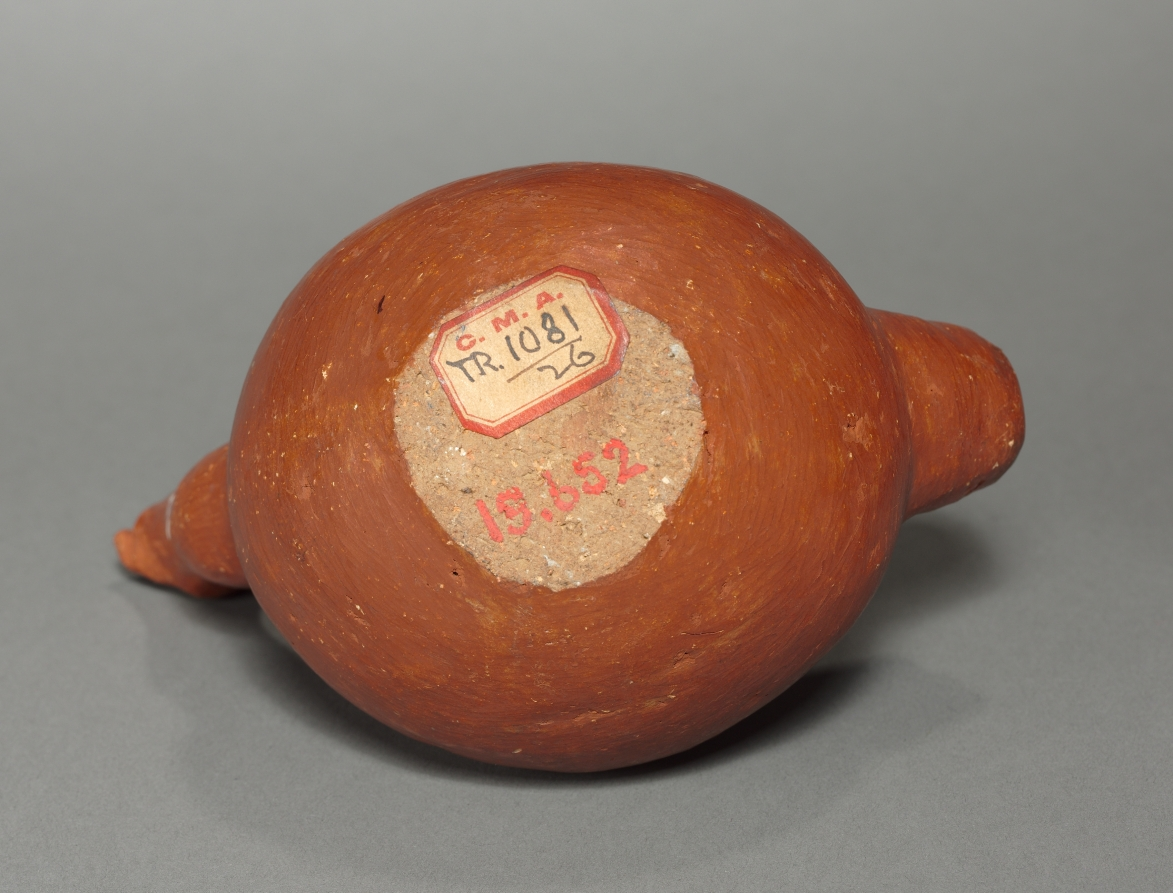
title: Bottle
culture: Peru, 20th century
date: 1900–1920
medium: pottery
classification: Ceramic